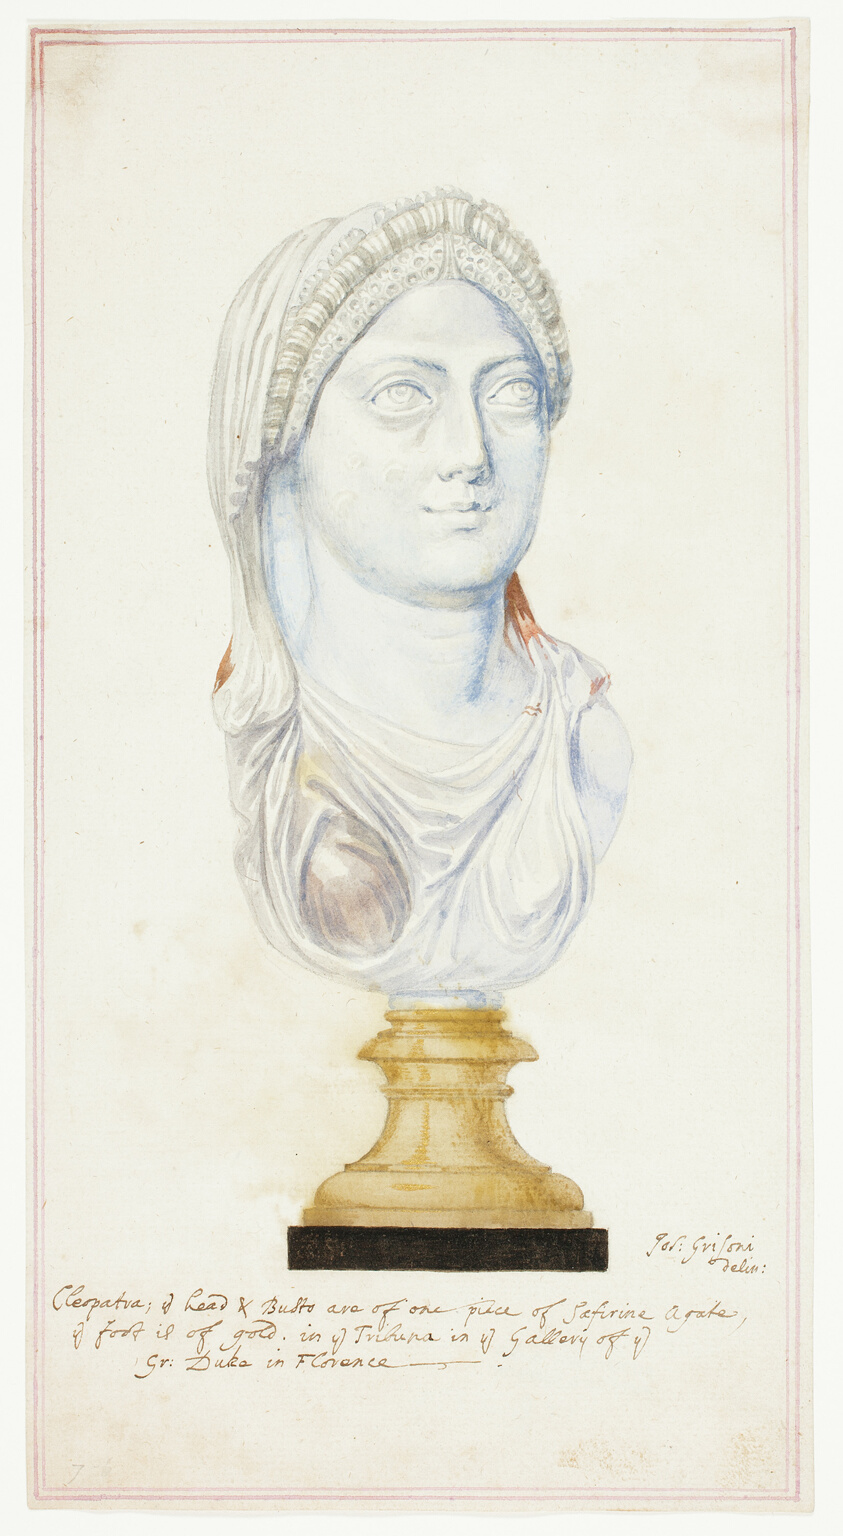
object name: Drawing and Watercolor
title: Agate Head of Cleopatra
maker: Giuseppe Grisoni (Italian, born Flanders, 1699-1769)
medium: Gouache, heightened with touches of gold paint, over black chalk, on ivory laid paper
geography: Italy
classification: gouache; drawings (visual works); prints and drawing